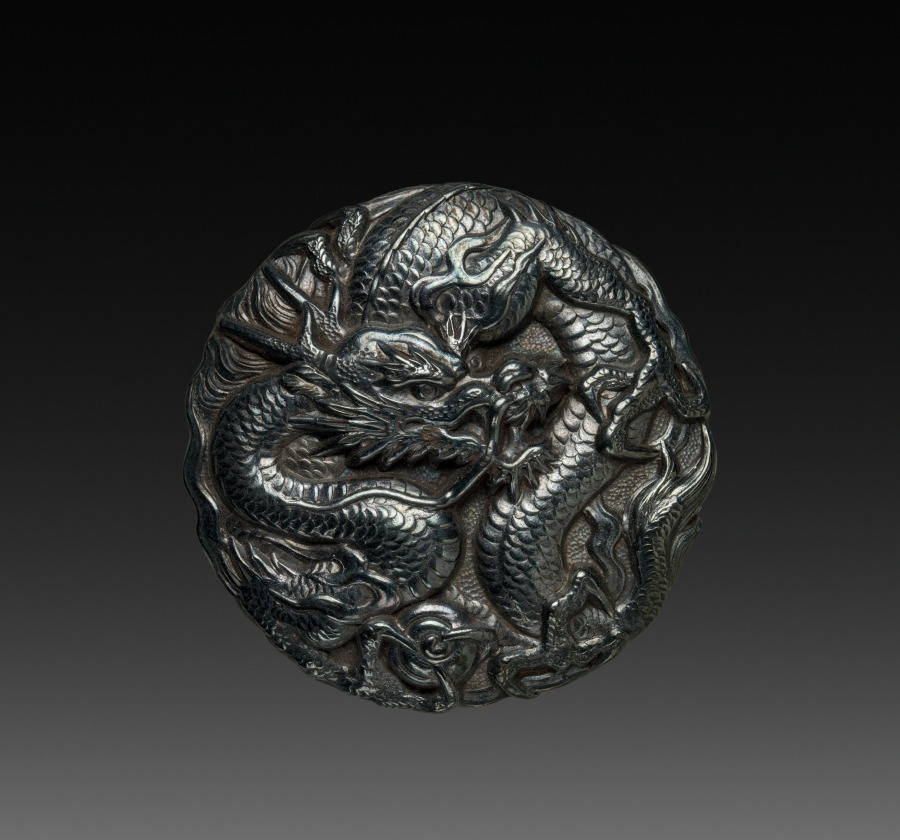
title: Button with Dragon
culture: Japan, Meiji period (1868–1912) or Taishō period (1912–26)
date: early 1900s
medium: cast (?) silver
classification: Metalwork